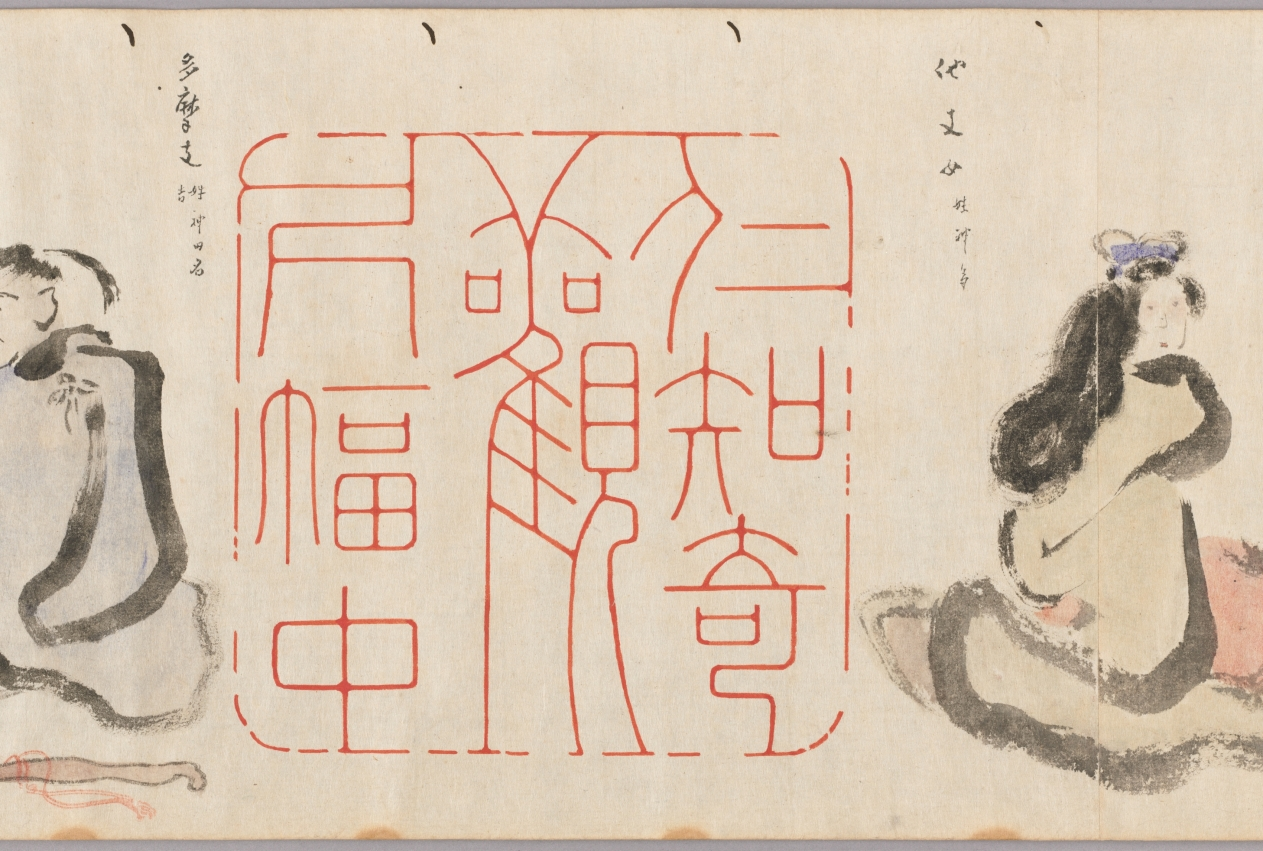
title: Chinese Seals and Poets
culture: Japan, Edo period (1615–1868)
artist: Hosokawa Rinkoku (Japanese, 1779–1843)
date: 1842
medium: handscroll; ink and color on paper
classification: Painting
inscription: Eight seal impressions are painted in red and alternate with sketchily painted figures. Artist's colophon at end of scroll.